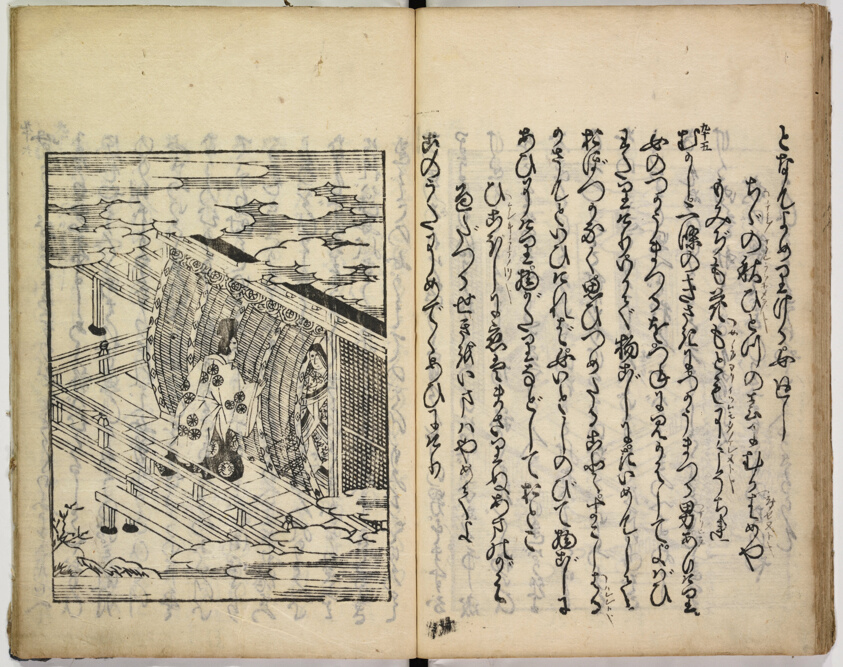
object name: Book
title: Tales of Ise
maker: Artist unknown, Japanese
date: 1645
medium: Woodblock-printed book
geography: Japan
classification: book